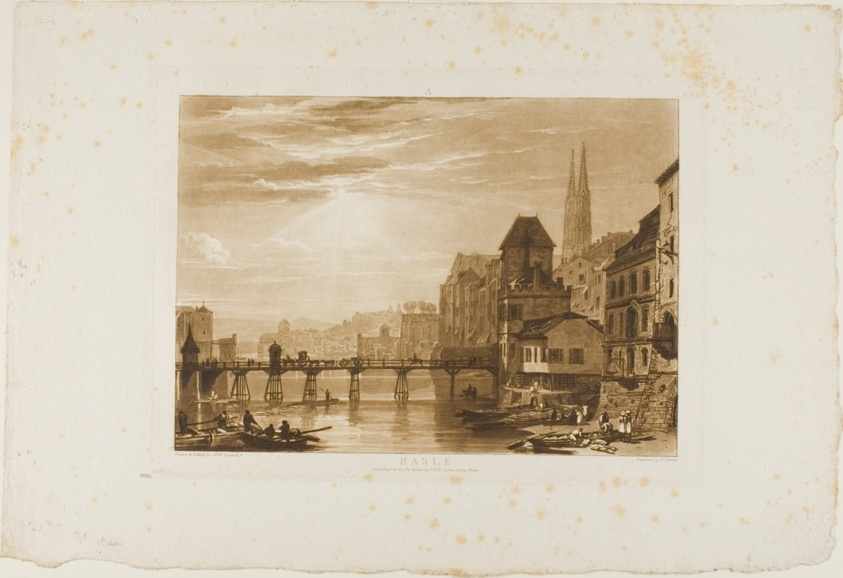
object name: Print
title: Basle, plate 5 from Liber Studiorum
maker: Joseph Mallord William Turner (English, 1775-1851); Engraved by Charles Turner (English, 1773-1857)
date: published 1807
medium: Etching and engraving in brown on ivory paper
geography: England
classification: etching; print; prints and drawing